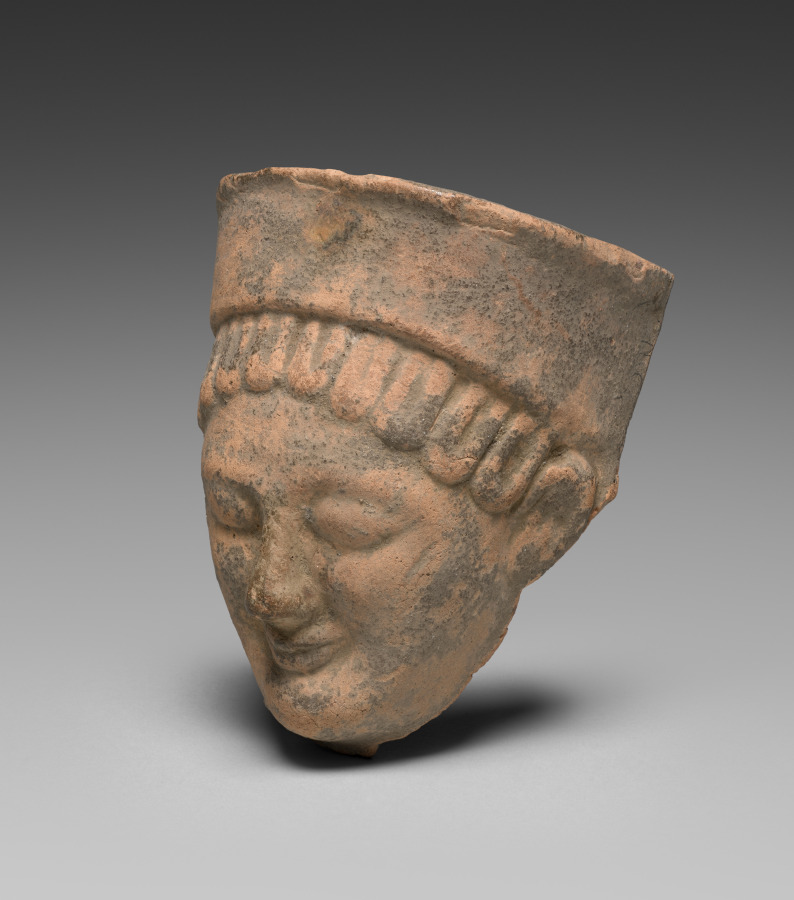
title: Mask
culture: Greece, Sicily, Selinus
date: 550 BCE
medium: terracotta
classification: Sculpture